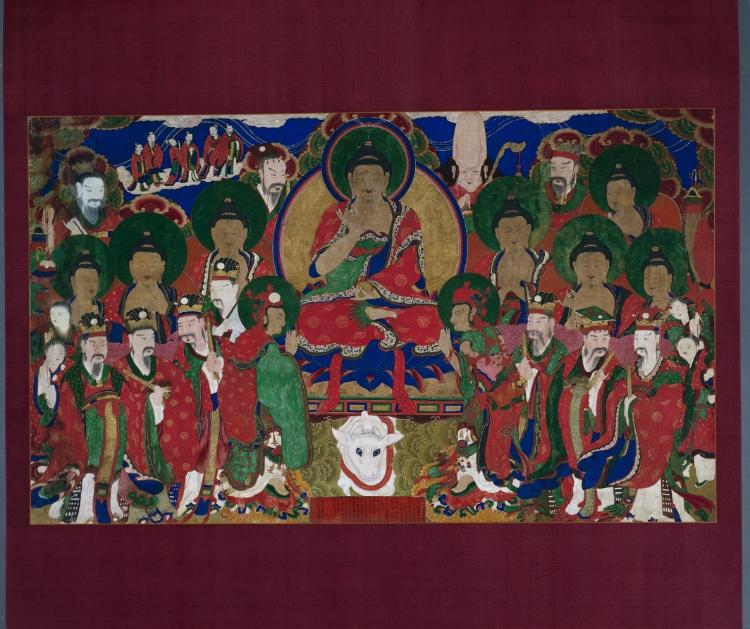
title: The Assembly of Tejaprabha Buddha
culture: Korea, Joseon dynasty (1392–1910)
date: 1878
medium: hanging scroll; ink, color, and gold on silk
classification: Painting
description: The main deity seated at the center is Tejaprabha, the Buddha of Radiant Light. Blazing beams of light emanating from its celestial body are this deity’s weapon to crush all kinds of calamities. Coincidently, when this painting was created, Korea was experiencing a height of foreign military aggressions, including invasions by the French (1866) and the US (1871). The inscription at the bottom center states that a group of ladies from the royal court commissioned the scroll to wish for the well-being of their families. During the late Joseon dynasty, Korean women became largely marginalized. Nevertheless, they remained important patrons of Buddhist art and architecture, voicing their concerns for their country and families in peril.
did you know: The central Buddha of Radiant Light is flanked by two attendant bodhisattvas, Sunlight and Moonlight, each in reverence posture.